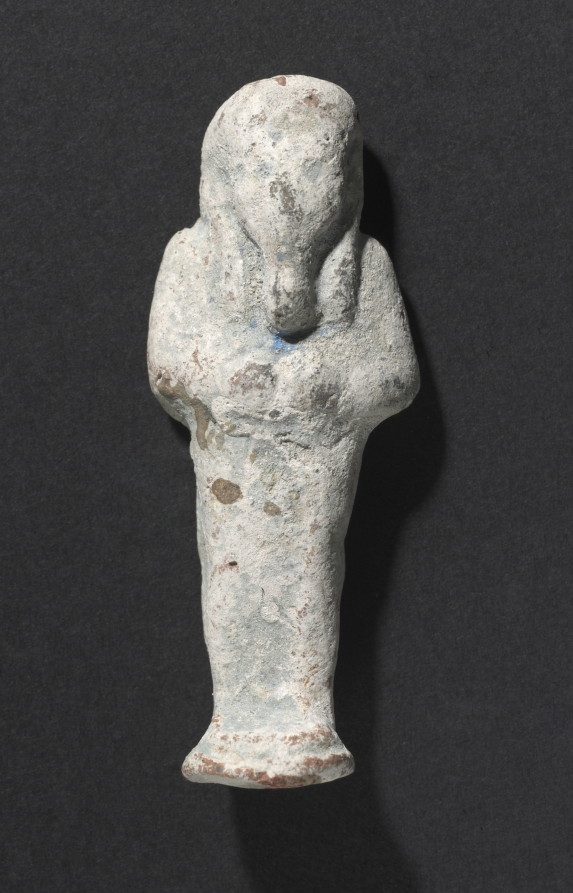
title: Shawabty of Ditamenpaankh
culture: Egypt, Late period (715–332 BCE), Dynasty 25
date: 715–656 BCE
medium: terracotta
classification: Funerary Equipment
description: High demand for shawabtys in the Late Period, a time when as many as 400 or more shawabtys were placed in the tomb with the deceased, gave rise to a specialized container for storing them: the shawabty box. This example is inscribed for the lady of the house, Ditamenpaankh, and was probably one of a pair originally made for her. The single-masted boat on the box's lid is perhaps an allusion to the pilgrimage of the deceased to the holy city of Abydos, the cult city of Osiris, king of the dead. The shawabtys inside are crude, mass-produced examples cast in an open mold. Made of terracotta, their blue paint imitates more costly shawabtys made of faience. As for the shawabty spell, it has been removed from its traditional location on the shawabty's front and relocated onto the sides of box, where it needed only to be written once, thus expediting production.